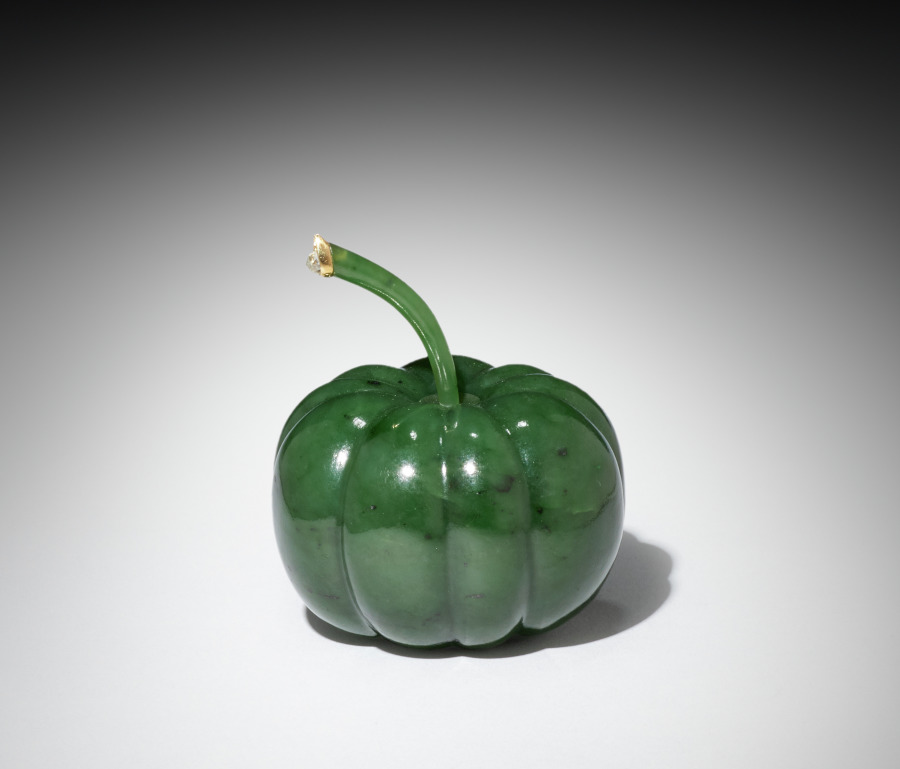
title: Stamp Moistener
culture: Russia, St. Petersburg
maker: firm of House of Fabergé (Russian, 1842–1918)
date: c. 1895–1915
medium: nephrite, diamonds, gold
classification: Miscellaneous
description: This stamp moistener in the form of a green tomato is carved out of a single piece of jade. The stem, tipped by a diamond mounted in gold, is removable. The interior end of this stem holds the brush that is used to wet a stamp for letters.